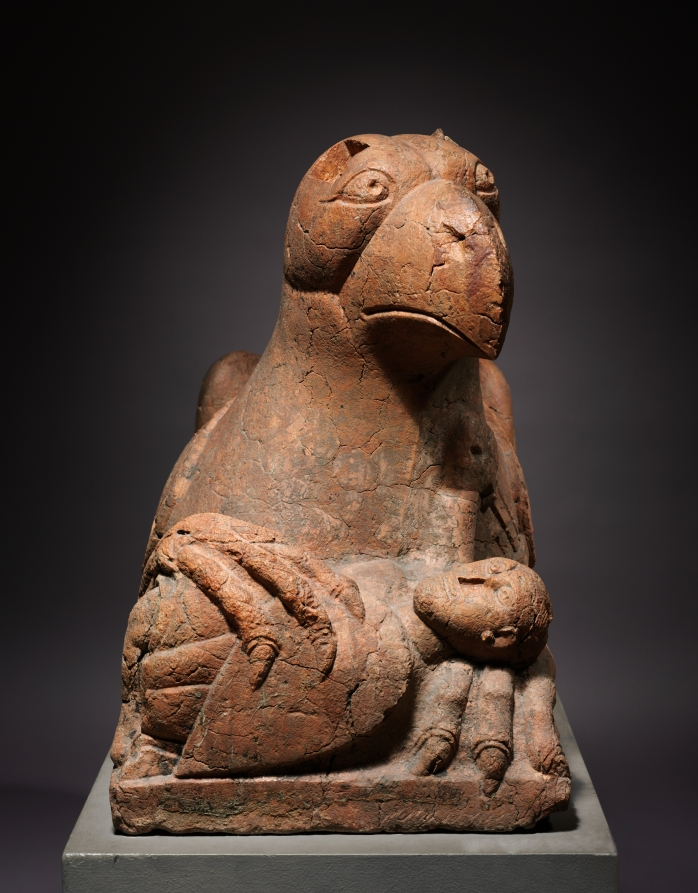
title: Guardian Griffin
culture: Northern Italy, Emilia, 12th century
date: 1150–1175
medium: pink limestone (called "Verona Marble")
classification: Sculpture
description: Griffins are fabled creatures that have the characteristics of an eagle and a lion--combining watchfulness and courage. In Christian art, the dual nature of the griffin was often used to signify that of Christ himself: divine (bird) and human (animal). Griffins were often used as guardian figures in church sculpture and were placed in portals and choir screens. The creatures seen here, with their inward-turning heads, were certainly used for such a purpose. When viewed from the front, one griffin may be seen protecting the figure of a knight between its paws, while the other griffin guards a calf. Their original function was probably to support the columns of a porch in front of a church doorway.